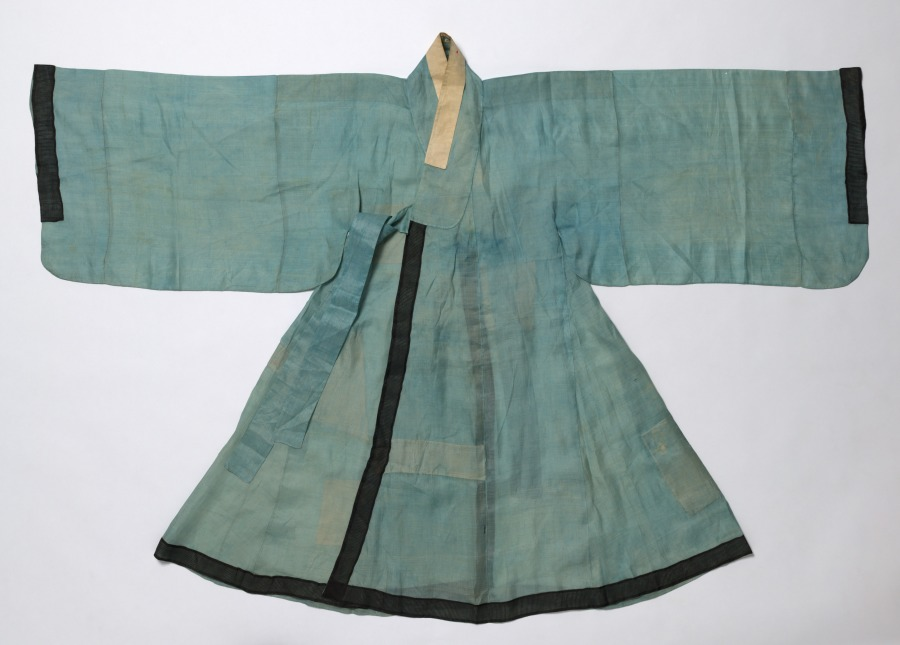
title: Inner Coat for the Royal Ceremonial Costume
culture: Korea, Joseon dynasty (1392–1910)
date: late 1800s–early 1900s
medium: silk: dyed blue, black, and white; gauze weave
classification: Garment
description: This is a set of royal ceremonial robe and accessories worn by a high-ranking court official for attending special state ceremonies. The set consists of an inner coat, an outer coat, a skirt, a back apron, a crown, a pair of jade tassels, a tablet, and a belt.